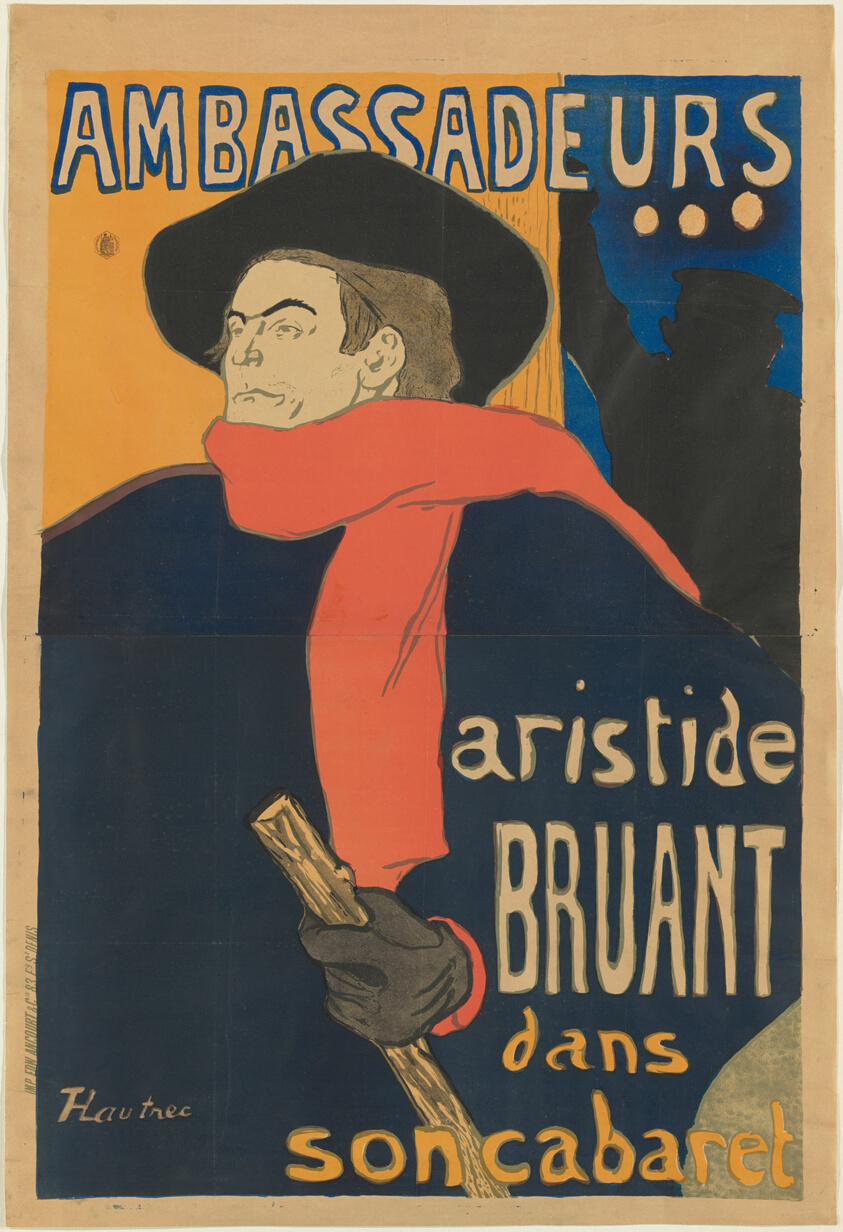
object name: Print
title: Ambassadeurs: Aristide Bruant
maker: Henri de Toulouse-Lautrec (French, 1864-1901)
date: 1892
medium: Color lithograph on tan wove paper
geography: France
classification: poster; print; prints and drawing